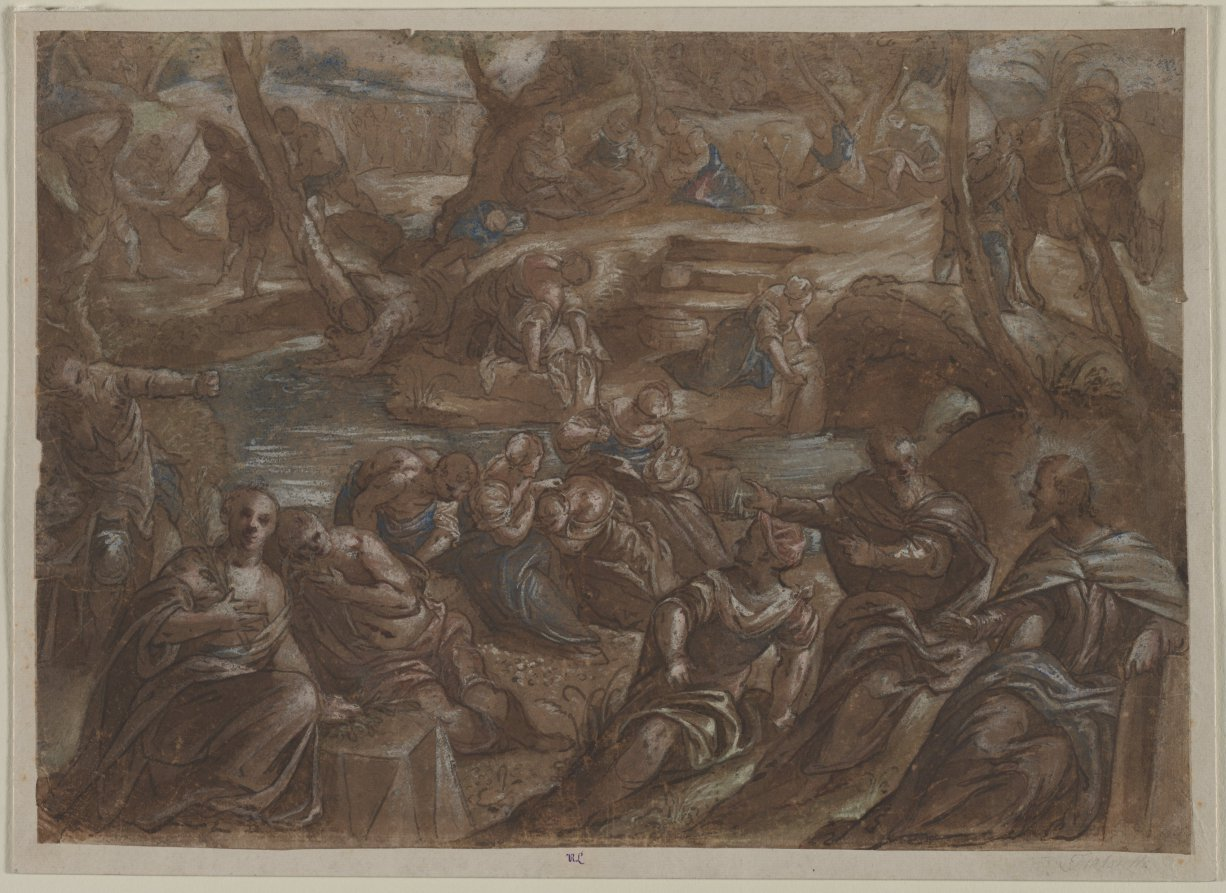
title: Copy of Tintoretto's Children of Israel Gathering Manna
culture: Italy, Venice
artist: copy after Jacopo Tintoretto (Italian, 1518–1594)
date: after 1594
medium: pen and brown ink and brush and brown wash, with brush and red (chalk?) wash and blue gouache, heightened with white gouache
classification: Drawing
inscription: lower right, in graphite: J. Ro[illegible] ; RECTO OF SECONDARY SUPPORT, lower right, in graphite: Tintoretto ; VERSO OF SECONDARY SUPPORT, lower center, in graphite: from the Robert Low Colln [n is superscript] / P.D.C. / 1910